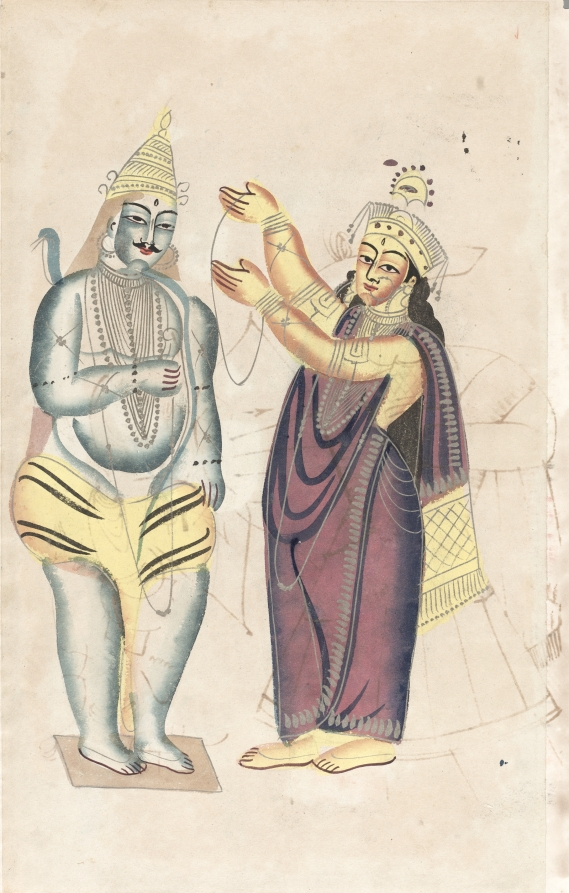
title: Parvati Placing a Wedding Garland on Shiva (recto), from a Kalighat album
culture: Eastern India, Bengal, Kolkata, Kalighat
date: c. 1890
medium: Gum tempera, graphite, ink, and tin on paper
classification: Painting